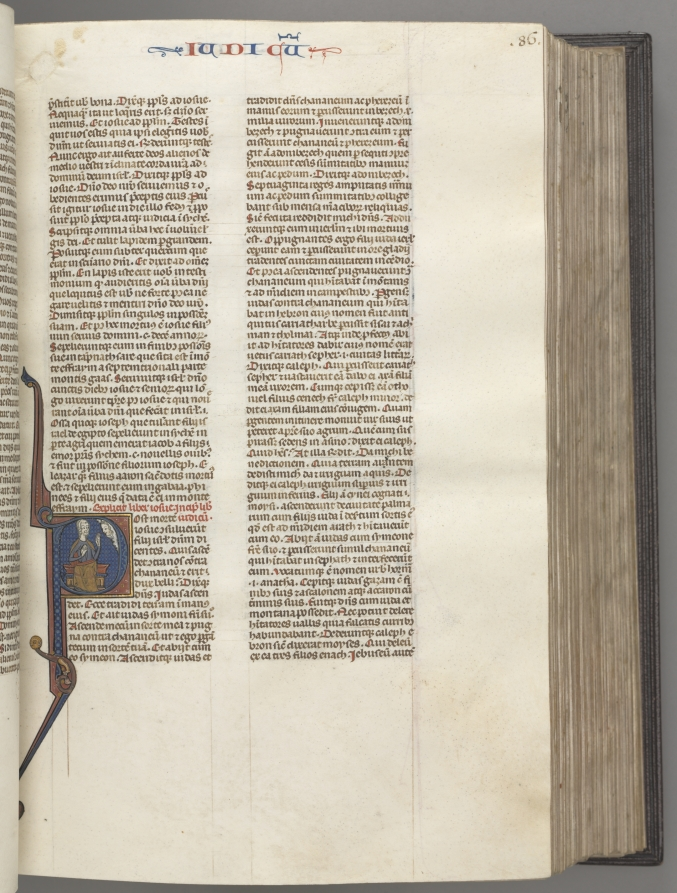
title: Fol. 86r, Judges, historiated initial R, Judah seated with a book talking to God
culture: Southern France, Toulouse(?), 13th century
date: c. 1275–1300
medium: ink, tempera and gold on vellum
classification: Bound Volume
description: Biblical manuscripts were highly prized and important possessions of churches, monasteries, cathedral schools, and universities throughout medieval Europe. The biblical texts were known as the vulgate, the translations made by Saint Jerome in the fourth century from Hebrew and Greek into Latin, which became the definitive and official Latin version of the Roman Church. In the 13th century, the bible was, for the first time, produced as a single volume with an officially sanctioned sequence to its books and chapters as illustrated by this example. The very extensive decoration of this bible is arranged hierarchically to indicate the relative importance of the various texts so that full or almost full-page initials mark the openings of the first prologue, Genesis, and the first Gospel; historiated initials mark the beginning of each book and illuminated initials mark the Prologues.